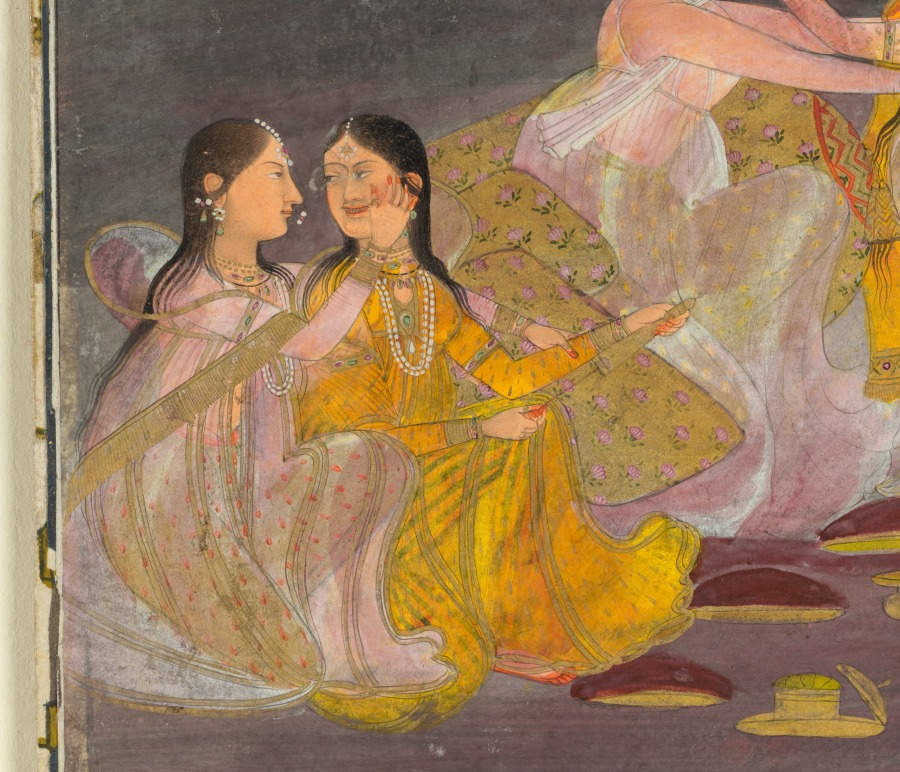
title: A prince celebrating Holi with palace women on a terrace at night (recto)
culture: India, Farrukhabad, Mughal, 18th century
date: c. 1760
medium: Gum tempera and gold on paper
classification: Painting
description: Images of pleasure and play abound in Mughal paintings of the latter half of the 1700s. Under a full moon reflected off a river and by the light of candles, a prince celebrates the spring festival of Holi with a group of palace women. Holi festivities include the boisterous tradition of smearing one another with colored powders—shown heaped on dishes—or shooting colored liquid using plunger guns.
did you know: Pairs of ducks swim under the full moon on the night of the vernal equinox.